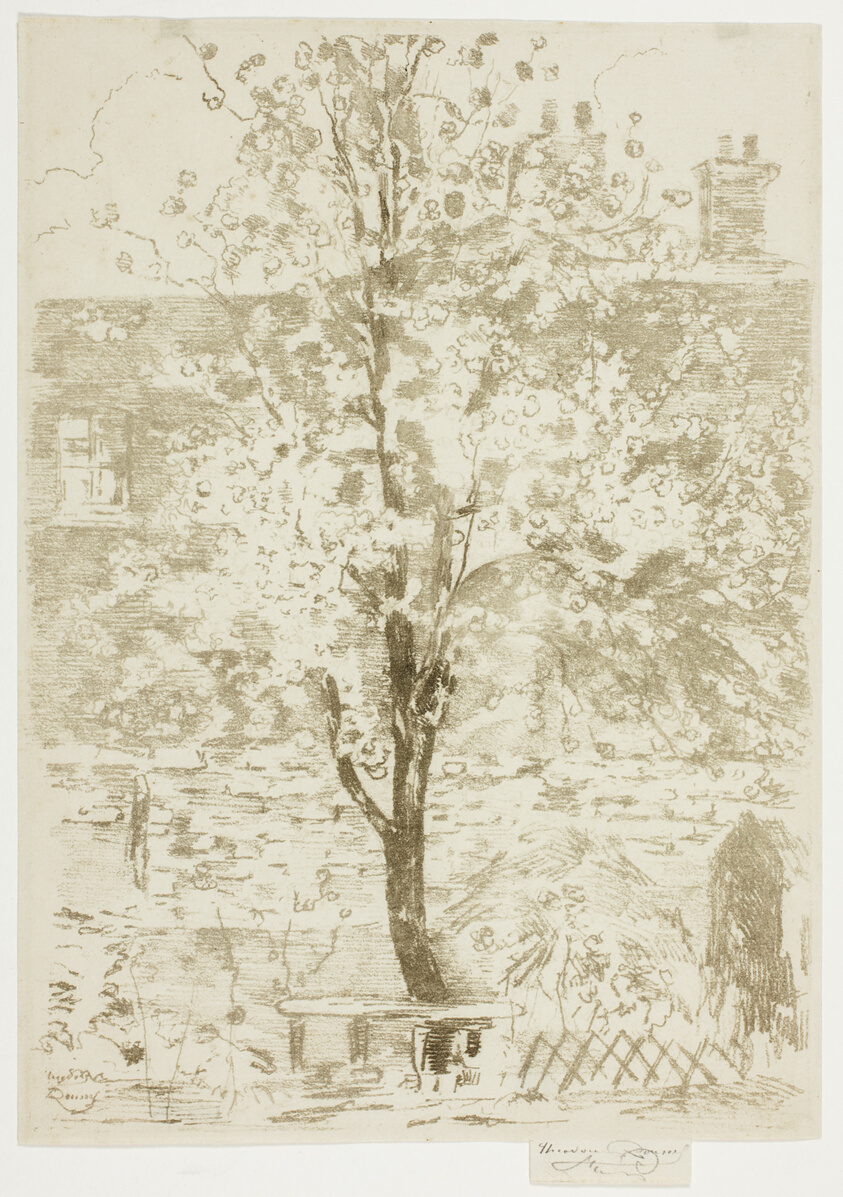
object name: Print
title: Spring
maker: Theodore Roussel (French, worked in England, 1847-1926)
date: 1906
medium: Soft ground etching in olive on cream laid paper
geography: England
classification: etching; paper; print; prints and drawing